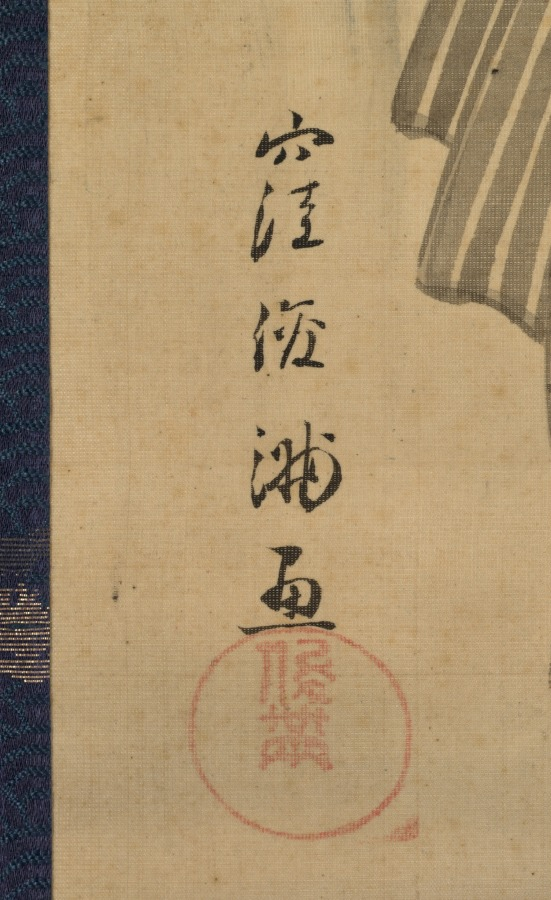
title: Woman and Two Children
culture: Japan, Meiji period (1868–1912)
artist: copy after Kubo Shunman (Japanese, 1757–1820)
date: early 1900s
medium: hanging scroll; color and gold on silk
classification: Painting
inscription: signed Kubo Shunman